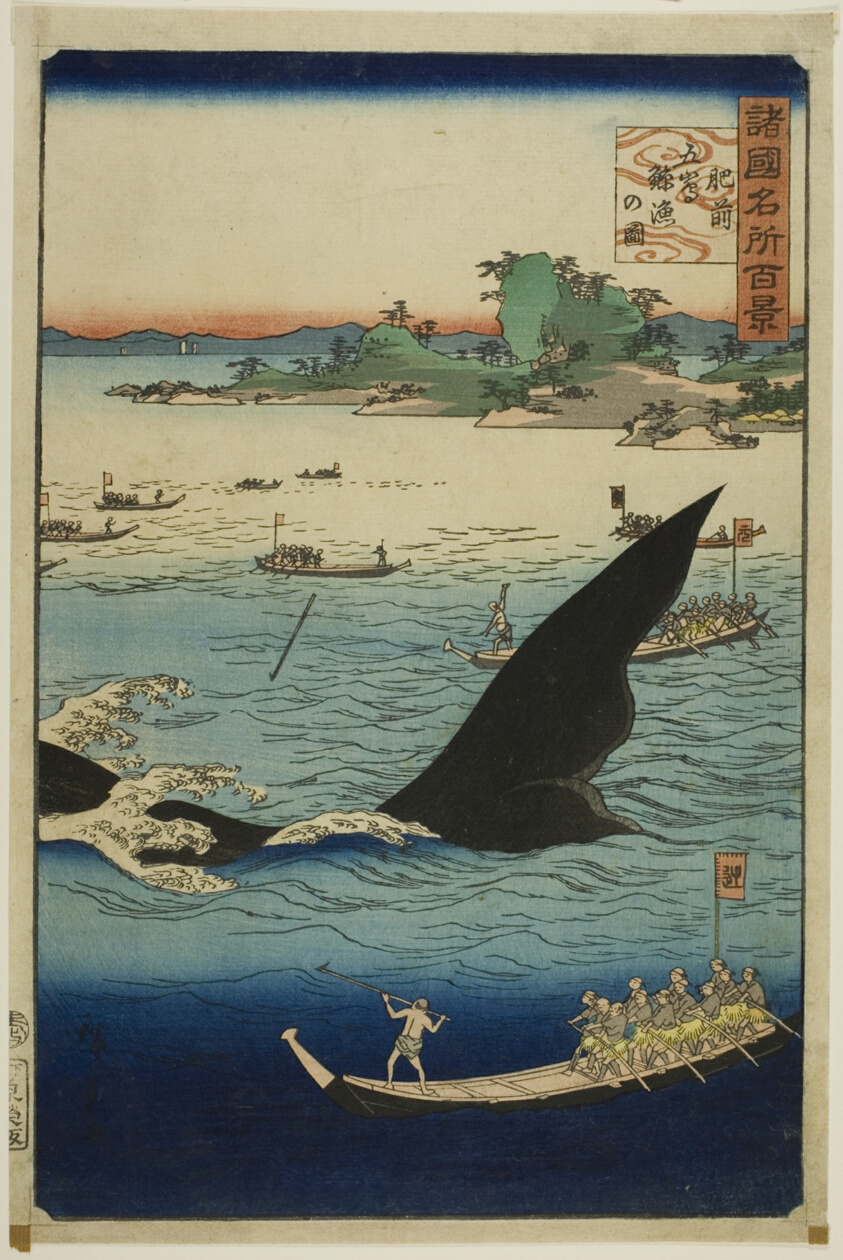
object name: Print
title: Image of a Whale Hunt at Goto, Hizen Province (Hizen Goto geiryo no zu), from the series “One Hundred Famous Views in the Various Provinces (Shokoku meisho hyakkei)”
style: Japanese (culture or style)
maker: Utagawa Hiroshige II (Shigenobu) (Japanese, 1826–1869)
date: 1859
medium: Color woodblock print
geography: Japan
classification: woodblock print; print